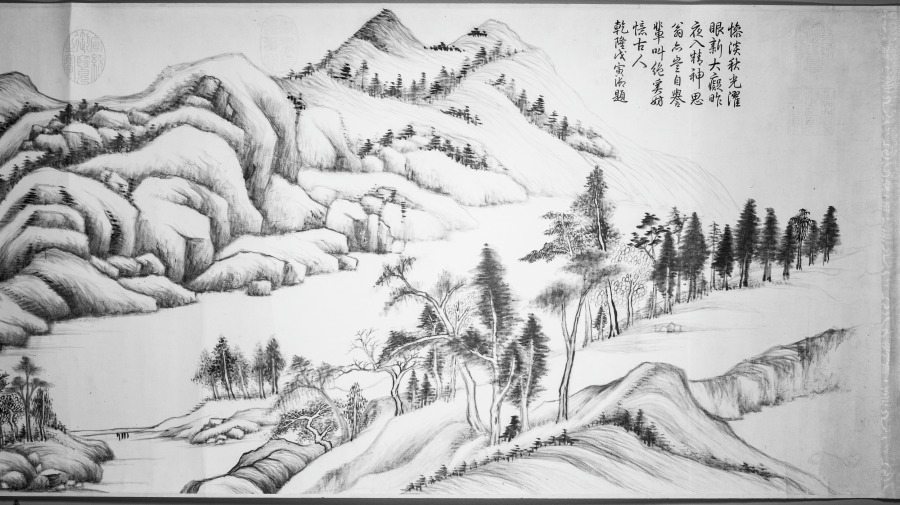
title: River and Mountains on a Clear Autumn Day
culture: China, Ming dynasty (1368–1644)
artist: Dong Qichang (Chinese, 1555–1636)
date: c. 1624–27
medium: Handscroll; ink on Korean paper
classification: Painting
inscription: 黃子久江山秋霽似此，當恨古人不見我也。思翁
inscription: 董文敏每遇高麗鏡面箋，書畫尤為入神。此卷改表紙用之，字跡隱然，兼有朝鮮之印。至於筆法圓秀，真接倪黃。豈文沈所可同日而語也。 康熙庚午中秋後一日，天氣澄爽，重裝初畢，跋於瓶廬。抱瓮翁高士奇。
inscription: Second inscription by Gao Shiqi 高士奇 (1645–1704): On the twenty-third day of the ninth month, the jiaxu year of the Kangxi era [1694], I packed my bags to head north. When my boat passed Wuchang [Suzhou], Mr. Mantang [Song Luo] brought wine to bid me farewell so that we could share our thoughts on our separation in the last few years. I showed him the paintings and calligraphy which I collected and asked his opinions. Since Mr. Mantang does not own any handscrolls by Wenmin [Dong Qichang], I leave this one for him in commemoration of our parting; thus the painting will have a worthy owner and our meeting will become a beautiful story in the future. It is the fourth day after the beginning of winter, with the sky clear and sober. Trees under frost have turned red and yellow, seemingly echoing the brush and ink in the painting. I also ask Mr. Mantang to inscribe a poem to commemorate our meeting so that it will survive forever.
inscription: 1 colophon and 4 seals of Song Luo 宋犖 (1634–1713): Who is the foremost art connoisseur of our dynasty?/ Tangcun [Liang Qingbiao, 1620–1691] is dead, so the title passes to Jiangcun [Gao Shiqi]./ Leaving office, you retired for five years in the Lake region./ Fondling handscrolls and hanging scrolls from morning to evening./ You sent me your collection catalogue Xiao Xia Lu last year;/ It is indeed the true equal of [Zhou Mi's] Yun Yan Guo Yan./ This year you returned to the capital by imperial order;/ Your boat with calligraphy and paintings anchored at the river bank in Suzhou./ When we met each other you did not waste any time for conversation by poured out immediately/ From your "coral net" extraordinary treasures./ You produced incomparable scrolls, with gold-inscribed labels and jade rollers,/ Pouring out from bags and trunks, they were spread in disarray./ Without a word, I rolled and unrolled until my fingers were numbed,/ We sat straight, facing each other quietly, and never felt tired./ For three days we forgot about sleeping and food./ And at times we shouted our joy out loud, forgetting who is host or guest./ Your Dwelling in the Fuchun Mountains and the Yuansheng manuscript/ These peerless works I myself examined with delight./ As an added pleasure to the farewell dinner under the Maple Bridge,/ You allowed me to hold again this handscroll by Dong Qichang--/ The Misty River and Piled Peaks [by Zhao Mengfu] and this Clear Autumn Day are two extraordinary masterpieces./ In showing such life and spirit with "qi yun." the artists were truly "men of heaven."/ The Clear Autumn Day is not even three feet long,/ Painted on tributary Korean paper, it shines like silver./ Every building up and every turn of the mountains imitates nature,/ Every tree and every rock is removed from the commonplace./ From the beginning, the theory of poetry is the theory of painting,/ Like the lotus and the morning sunshine, they complement and refresh each other./ The artist's inscription regrets that "the Old Masters cannot see my scroll."/ Huang Gongwang would have agreed in his grave./ The vermilion of the seals glitter and dazzles the eyes,/ These added accessories are as valuable as jade./ You are very kind to give it to me,/ The feelings expressed in your inscription are so sincere./ Wanting to refuse, but unable, I accept it to respect your wish,/ And taking off my gown and cap I wrapped it with care./ You asked me to write a long poem in commemoration of this beautiful occasion,/ I am too ashamed that my effort in response is so poor and inadequate./ Returning home, I unrolled it under candlelight, trying to write the colophon,/ The light of the waning moon shines at the foot of the mossy wall./ Earnestly humming and brows knit in deep thought, I try to compose;/ The verses are not outstanding, but the facts are real./ With this poem recorded at the end of the scroll, I mail it to you for approval,/ This poem and this painting shall outlast a thousand springs. (Translation by LYSL/HK/WKH)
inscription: 1 colophon and 2 seals of Shao Changheng 邵長蘅 (1637–1704); 2 inscriptions and 14 seals of the Qianlong 乾隆 emperor (r. 1736–95); 1 seal of the Jiaqing 嘉慶 emperor (r. 1796–1820); 3 seals of the Xuantong 宣統 emperor (r. 1908–11); 1 seal unidentified.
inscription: [印] 朝鮮國王之印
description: Dong Qichang had a tremendous impact on the artistic practices and historiography of later generations; his works and writings shaped literati aesthetics. Here, Dong places an abstract landscape composition diagonally across the picture plane, configured to recall earlier masters and simultaneously express his own personal style. Dong’s inscription claims, Huang Gongwang’s Autumn Day, looks like this. I truly regret the master has not seen my work. In fact, Dong Qichang may have had Dong Yuan’s Xiao and Xiang Rivers in mind, a work he owned and considered a key work in Chinese art history.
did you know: The painting has an imprint of a Korean seal that reads "Seal of the king of Joseon."